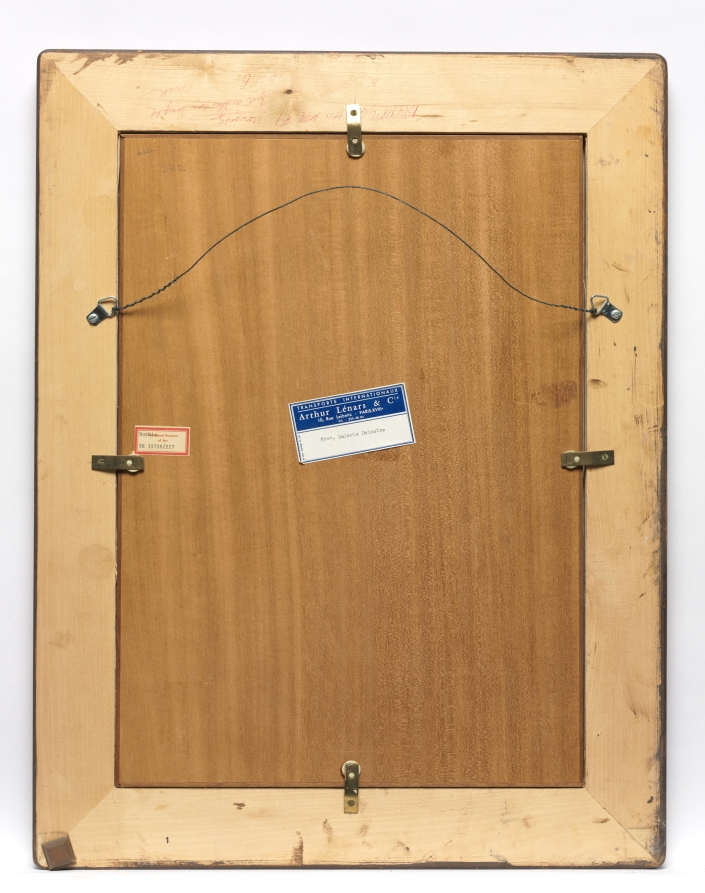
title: Ruined Church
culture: France, 19th century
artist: Adrien Dauzats (French, 1804–1868)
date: c. 1840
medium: oil on panel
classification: Painting